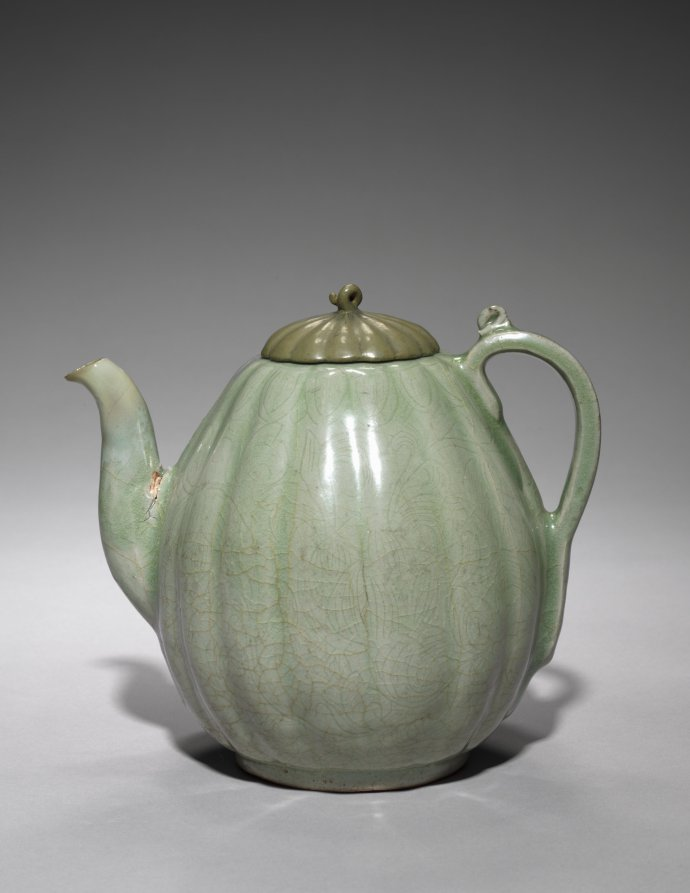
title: Melon-shaped Wine Ewer with Incised Chrysanthemum Design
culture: Korea, Goryeo dynasty (918–1392)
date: 918–1392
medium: pottery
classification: Ceramic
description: As early as the seventh century, the practice of drinking tea and wine became an important part of elite culture in Korea. Elites of the Goryeo period commissioned a variety of types of utensils and vessels including this elegant pot, not only to make their drinking experience more exciting, but also to show their appreciation of nature.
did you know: Originally the lid was not coupled with this pot.